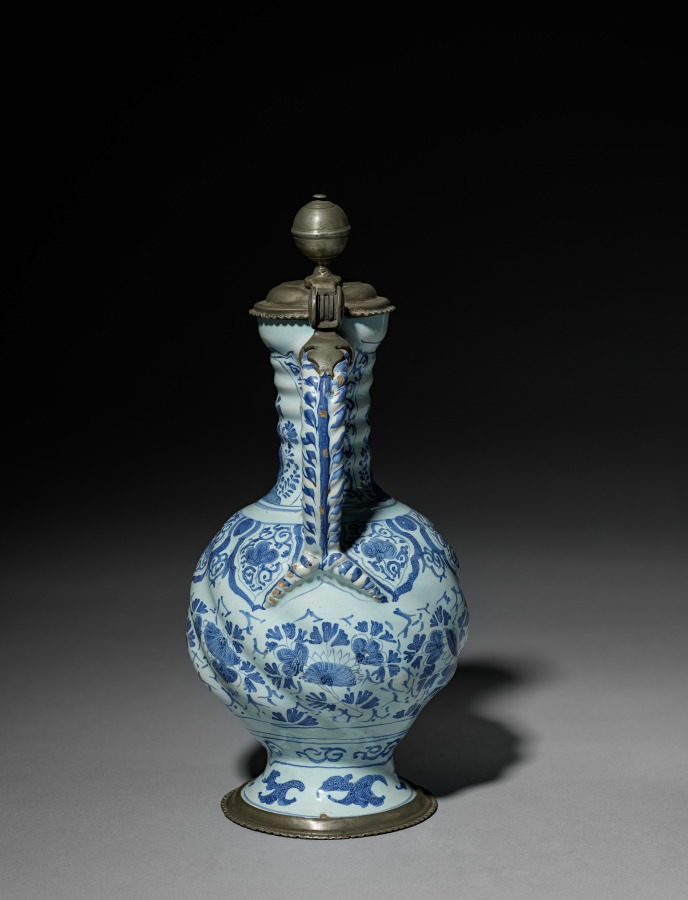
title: Ewer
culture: Germany, Frankfurt(?), early 18th century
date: c. 1700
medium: earthenware decorated in underglaze blue with pewter mounts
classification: Ceramic